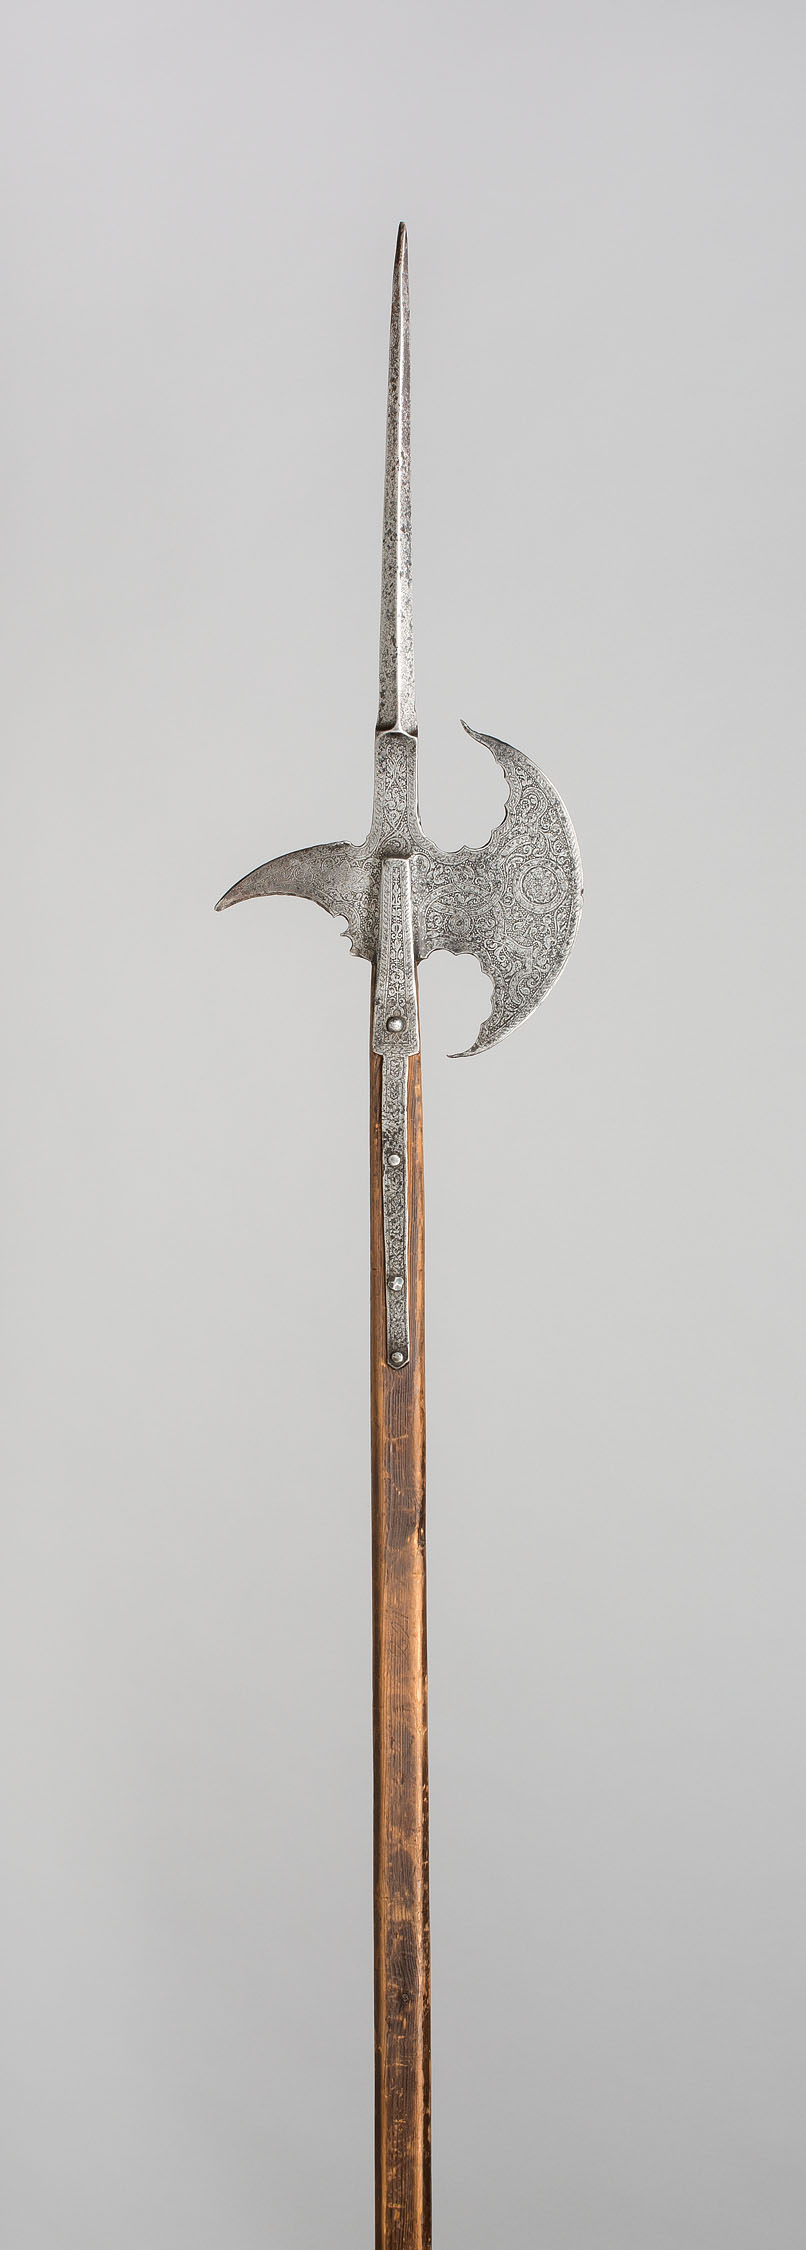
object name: Arms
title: Halberd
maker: German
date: 1592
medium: Steel, iron, and wood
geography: East Germany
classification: edged weapon-staff; arms; arms and armor